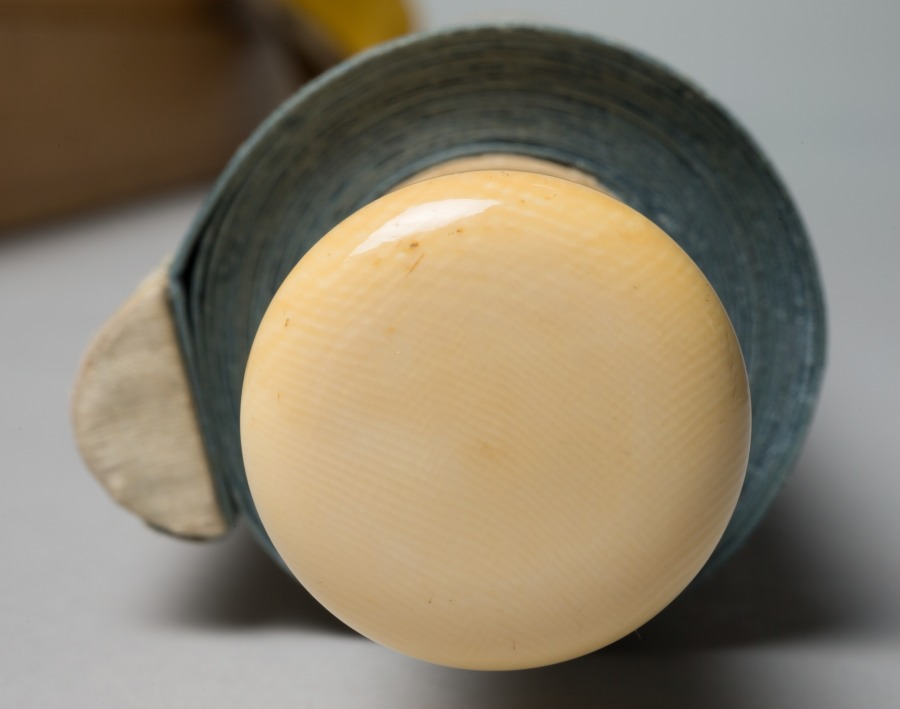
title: Mountain View and Blue Water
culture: Japan, Edo period (1615–1868)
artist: Tanomura Chikuden (Japanese, 1777–1835)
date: early 1800s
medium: hanging scroll; ink, color, and gold on paper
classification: Painting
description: Tanomura Chikuden was an eminent painter whose adopted son, Tanomura Chokunyū (1814–1907), was Seifū Yohei III’s painting teacher. This work was displayed at a gathering commemorating the 10th anniversary of Chokunyū’s death, something we know only because its custom-made box and archival documents have been carefully kept together. The box inscription also confirms that Chikuden was emulating the style of the Mi family of painters, active during China’s Southern Song dynasty (1127–1279). The painting’s Chinese-style silk wrapper is inscribed and sealed on its interior by members of Chokunyū’s community.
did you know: The mountain shapes are built up with multiple small wet strokes.